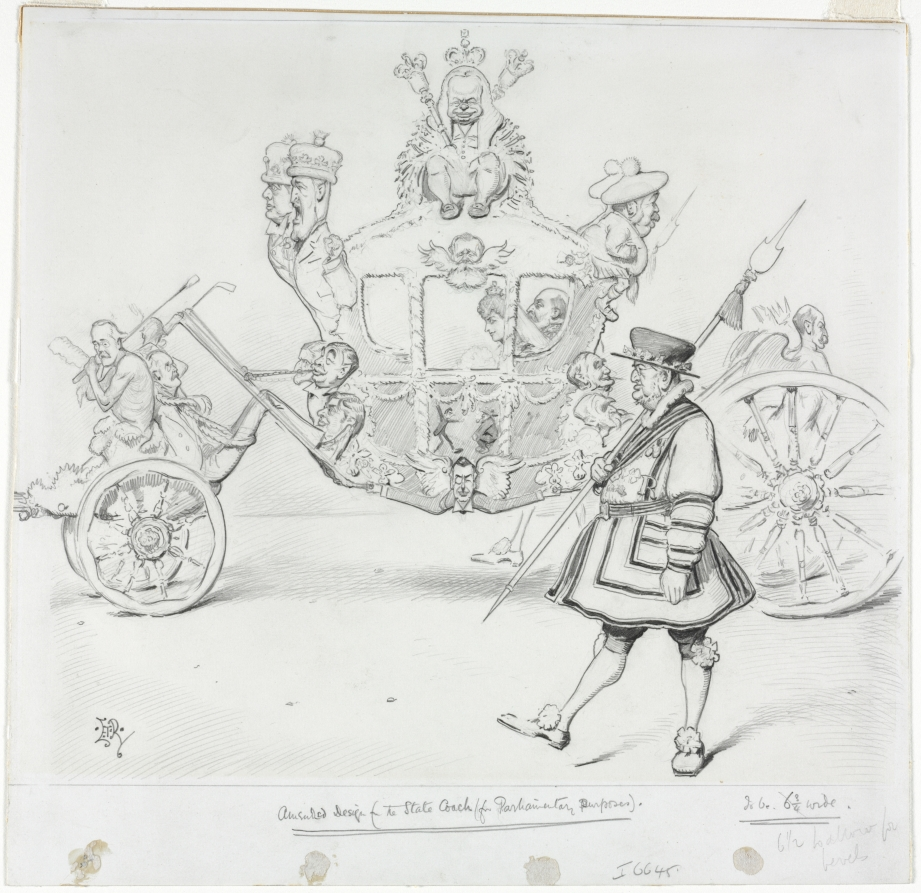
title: The Stagecoach for Parliamentary Purposes (recto)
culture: England, late 19th-early 20th century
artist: Edward Tennyson Reed (British, 1860–1933)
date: c. 1889–1933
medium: graphite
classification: Drawing